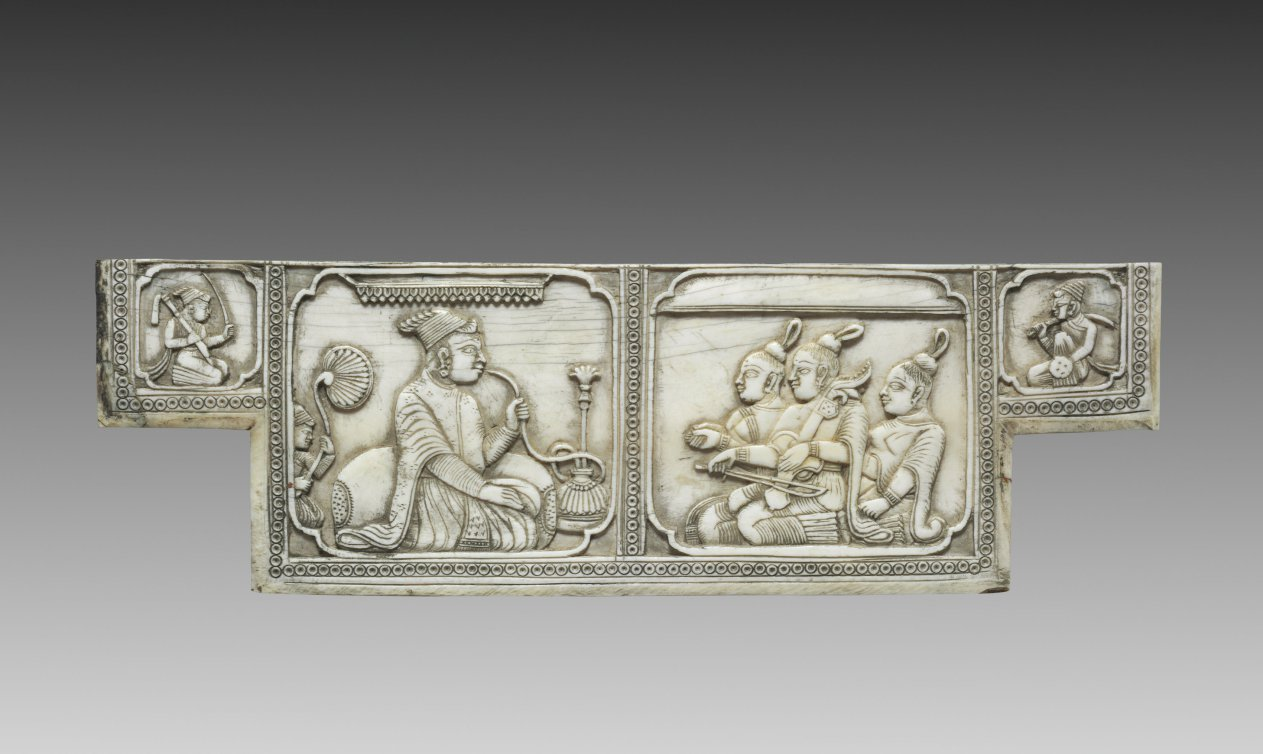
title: Panel from a Box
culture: India, North East Deccan, Visakhapatnam district, Mughal Dynasty (1526-1756)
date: c. 1700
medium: ivory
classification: Ivory